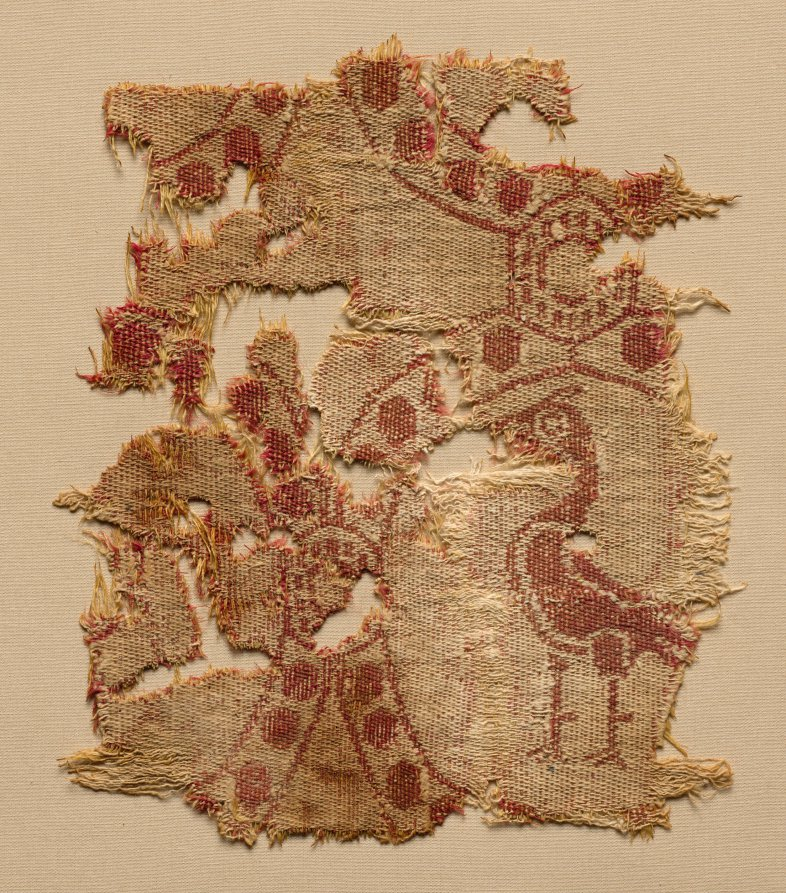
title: Fragment of roundels with single bird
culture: Iran, Iraq, or Syria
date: 700s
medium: samite: wool and cotton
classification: Textile